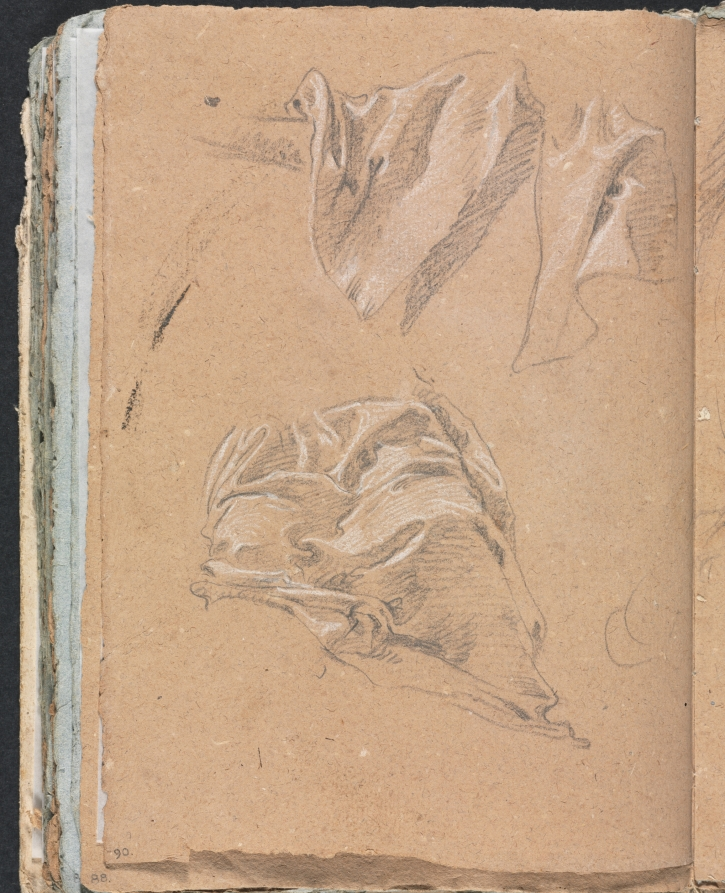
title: Verona Sketchbook: Drapery studies (page 90)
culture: Italy, 18th century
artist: Francesco Lorenzi (Italian, 1723–1787)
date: 1760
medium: black chalk with white heightening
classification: Bound Volume